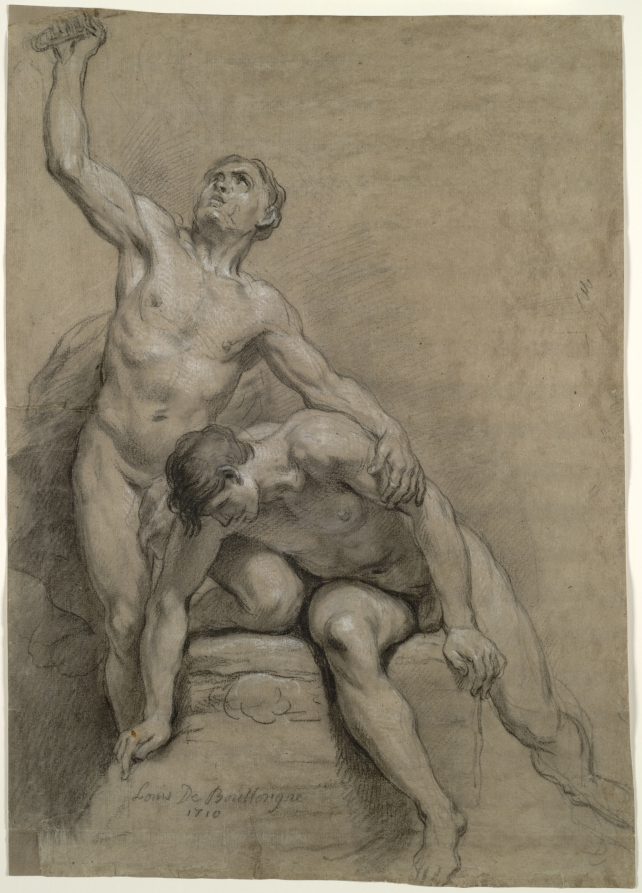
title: Two Male Nudes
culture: France, 18th century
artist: Louis de Boullogne (French, 1654–1733)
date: 1710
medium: black chalk, heightened with white chalk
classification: Drawing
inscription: signed, lower center, in black chalk: Louis De Boullongne / 1710; verso, lower right, in graphite: 1608 [underlined] / 3; lower center, in graphite: #19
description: Michelangelo’s masterful rendering of the male nude set the standard for many generations of artists studying in academies across Europe. Life drawings (made from nude models) became so essential to an artist’s training at the Royal Academy of Painting and Sculpture in Paris (founded in 1648 by Louis XIV) that finished drawings like these were commonly called academies. Louis de Boullogne served as a professor of life drawing at the Royal Academy between 1694 and 1715. This work reflects the common practice of drawing from two models, which allowed artists to explore a narrative. Here the figures resemble a wounded warrior and his companion.